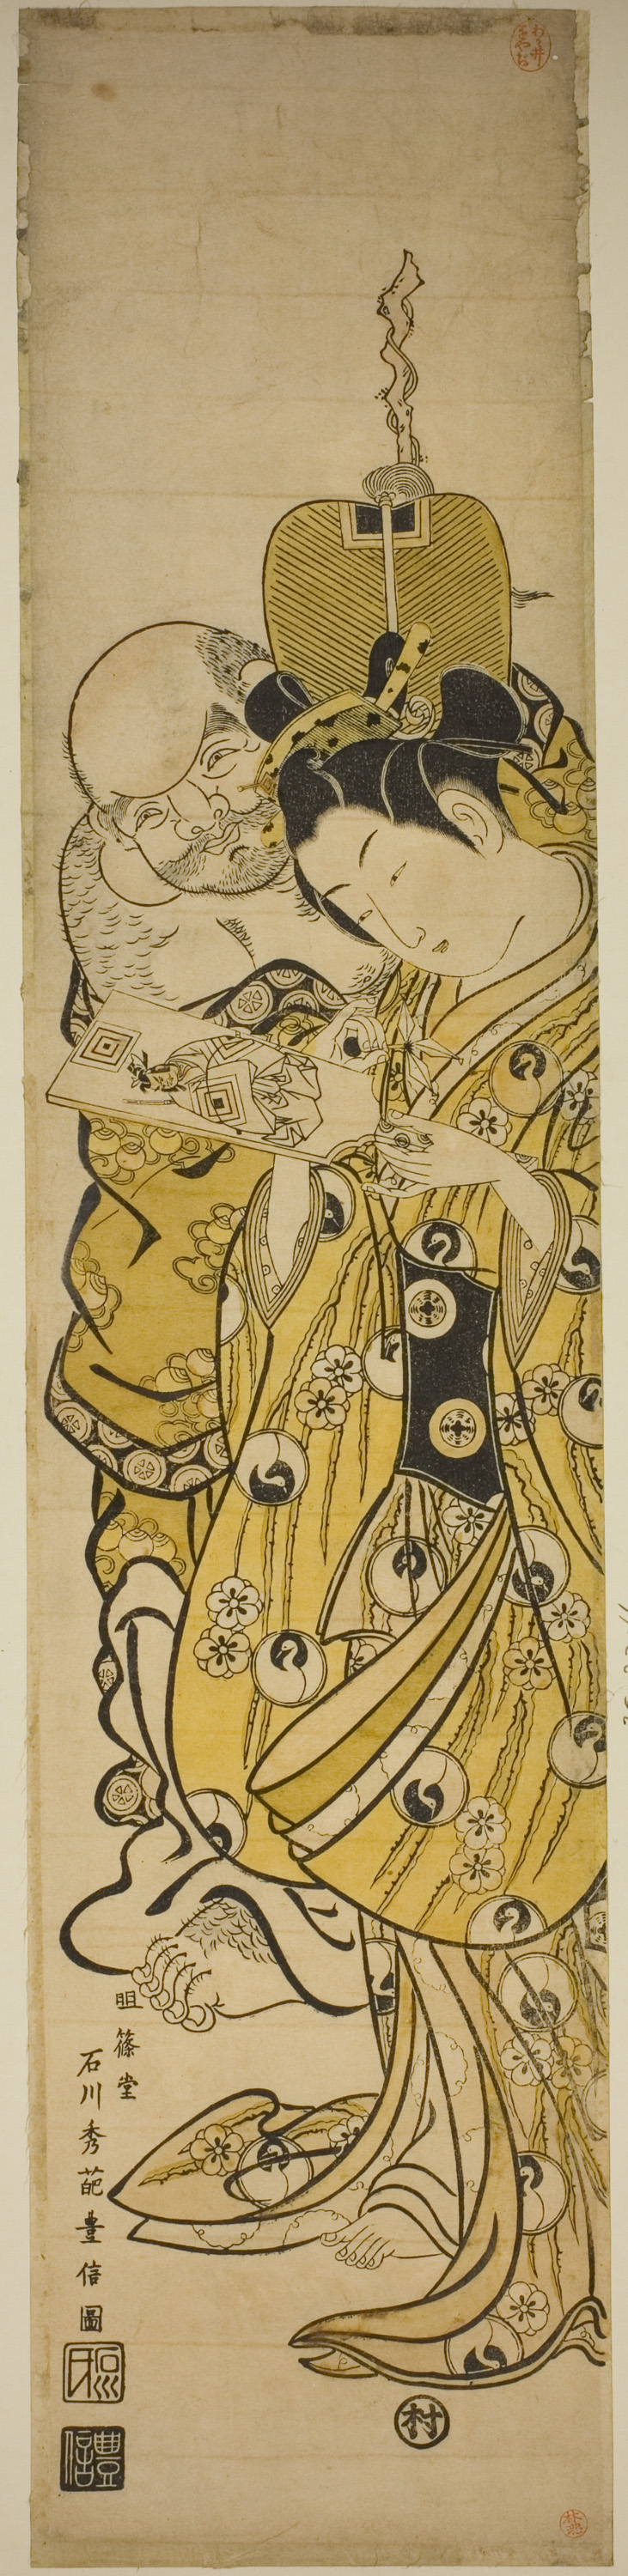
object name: Print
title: Young Woman and Hotei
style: Japanese (culture or style)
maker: Ishikawa Toyonobu (Japanese, 1711-1785)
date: c. 1741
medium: Hand-colored woodblock print; wide hashira-e, sumizuri-e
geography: Japan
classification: woodblock print; print; asian art